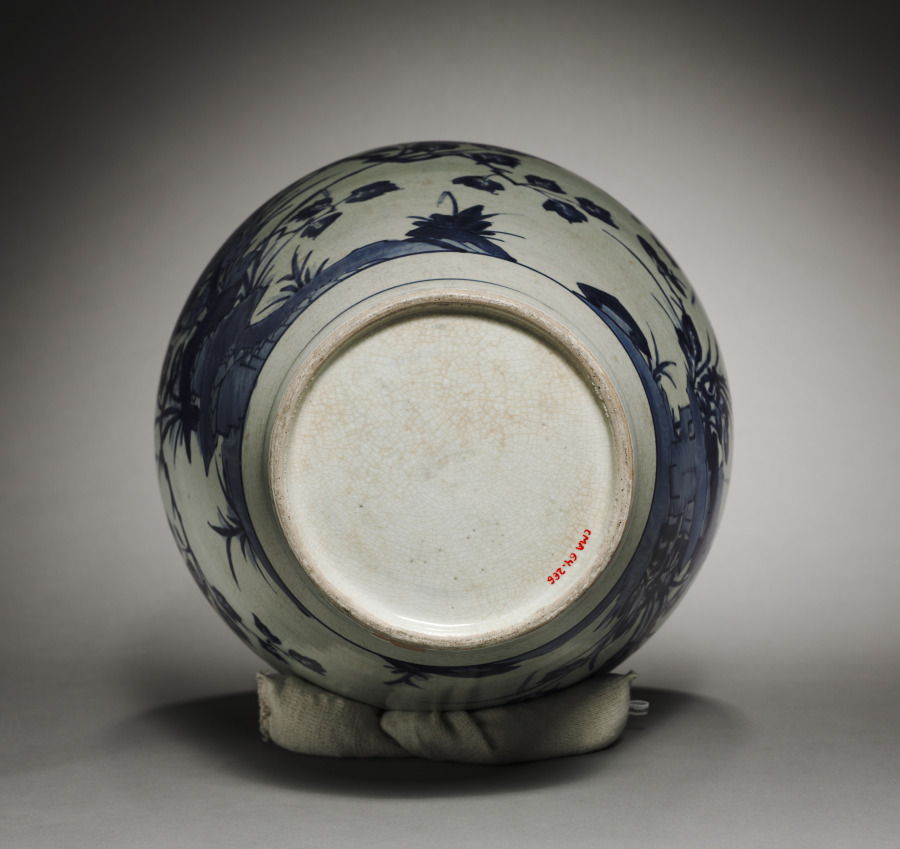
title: Large Jar with Peonies, Orchids, and Chrysanthemums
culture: Japan, Edo period (1615–1868)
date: late 1600s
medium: Porcelain with underglaze blue decoration (Imari ware)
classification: Ceramic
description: Spring peonies, summer orchids, and autumn chrysanthemums bloom at the same time amid garden rocks. These underglaze blue motifs were inspired by similar designs on Chinese ceramics made for export to Europe. In the early 1600s, Korean potters in Japan discovered kaolin, the clay essential for porcelain production. At the same time, political turmoil in China following the collapse of the Ming dynasty (1368–1644) disrupted Chinese exports. Together, these circumstances created an opportunity for Japan to supply ceramics to the European market. Careful study of Chinese prototypes shaped the work of Japanese ceramists for both domestic and overseas audiences.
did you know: This design shows the changing of the seasons: one side depicts a peony blossom in the spring, and the other side continues with chrysanthemums and an orchid in the autumn.